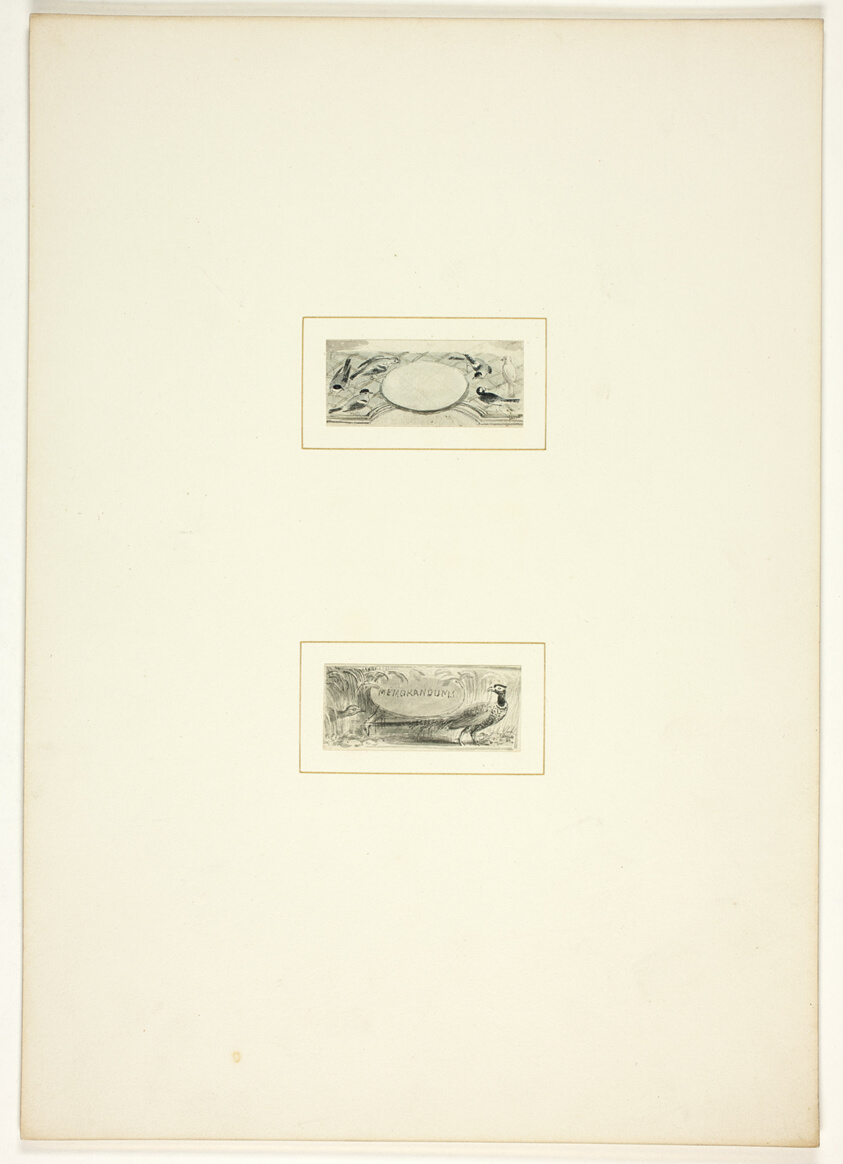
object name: Drawing and Watercolor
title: Study for a plate from The Task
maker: Thomas Stothard (English, 1755-1834)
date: c. 1800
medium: Ink wash on paper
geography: England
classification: ink or chalk wash; drawings (visual works); prints and drawing